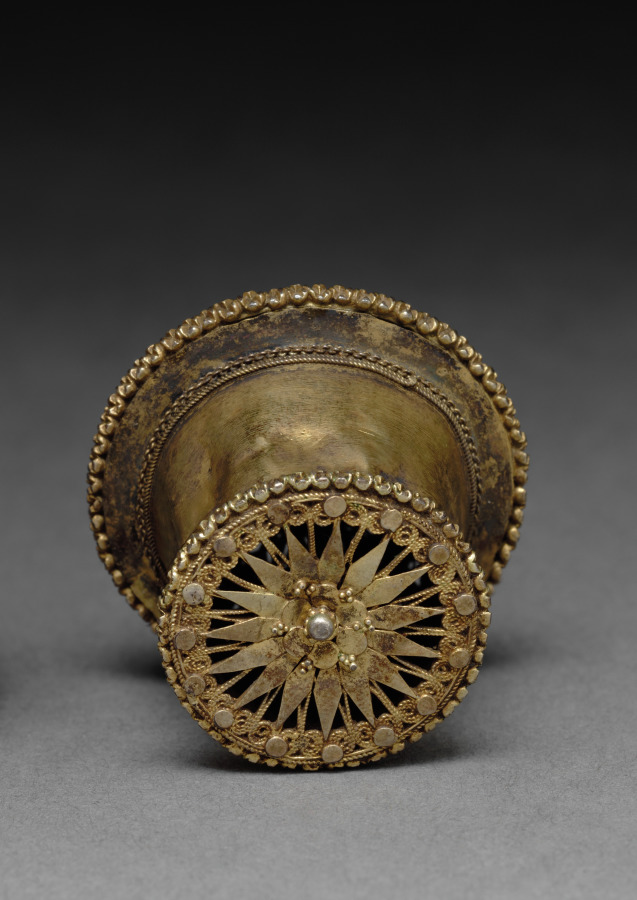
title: Earring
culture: Burma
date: 1800s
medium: silver gilt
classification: Jewelry